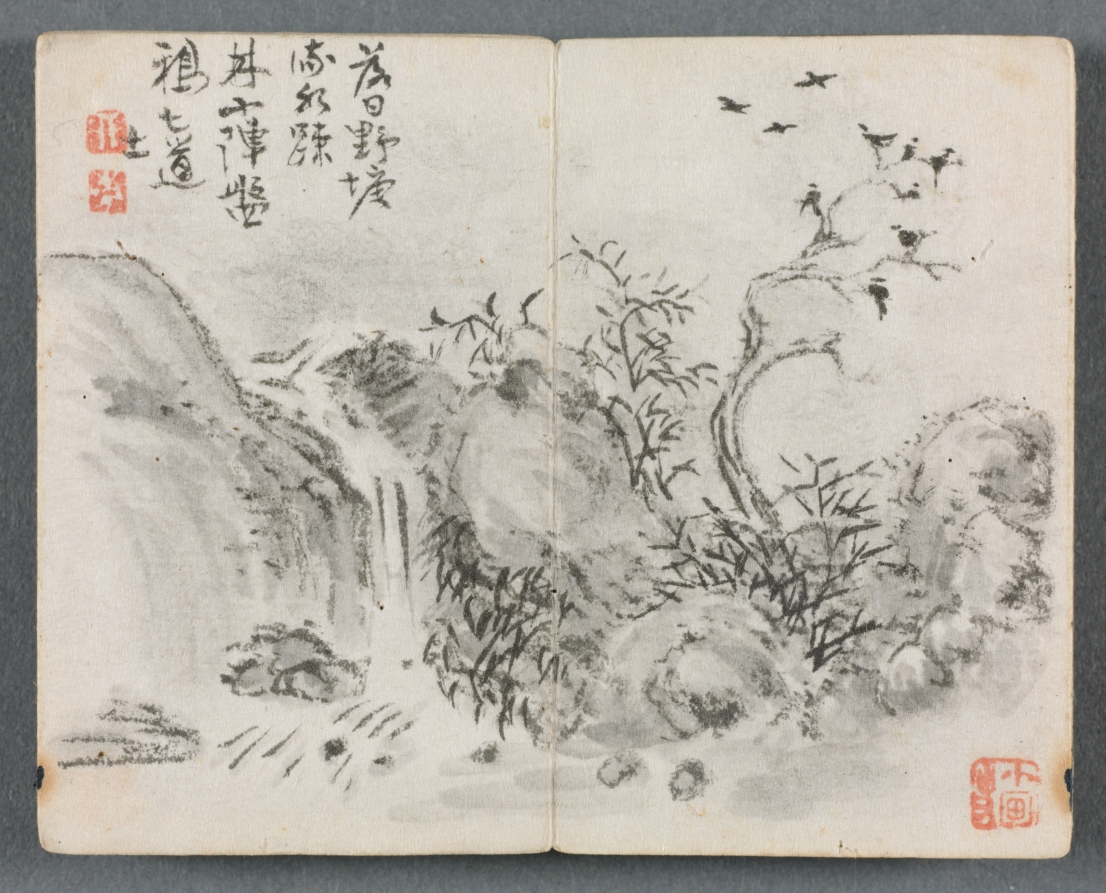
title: Miniature Album with Figures and Landscape (Waterfall Landscape)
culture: China, Qing dynasty (1644–1911), Qianlong reign (1736–95)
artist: Zeng Yandong (Chinese, c. 1751–1827)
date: 1822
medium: album leaf, ink and color on paper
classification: Painting